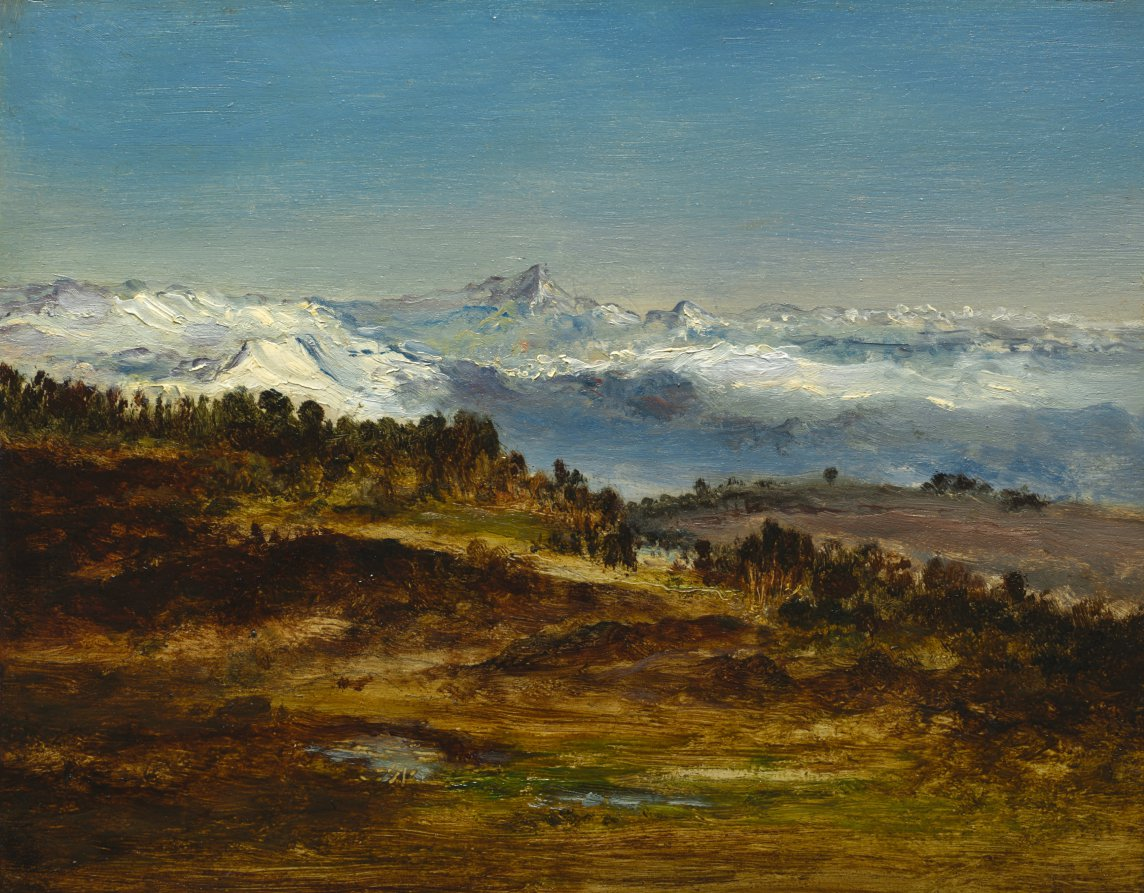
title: The Pyrenees, the Peak of the Midi de Bigorre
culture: France, 19th century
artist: Narcisse Diaz de la Peña (French, 1807–1876)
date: 1871–1872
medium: oil on wood panel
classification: Painting